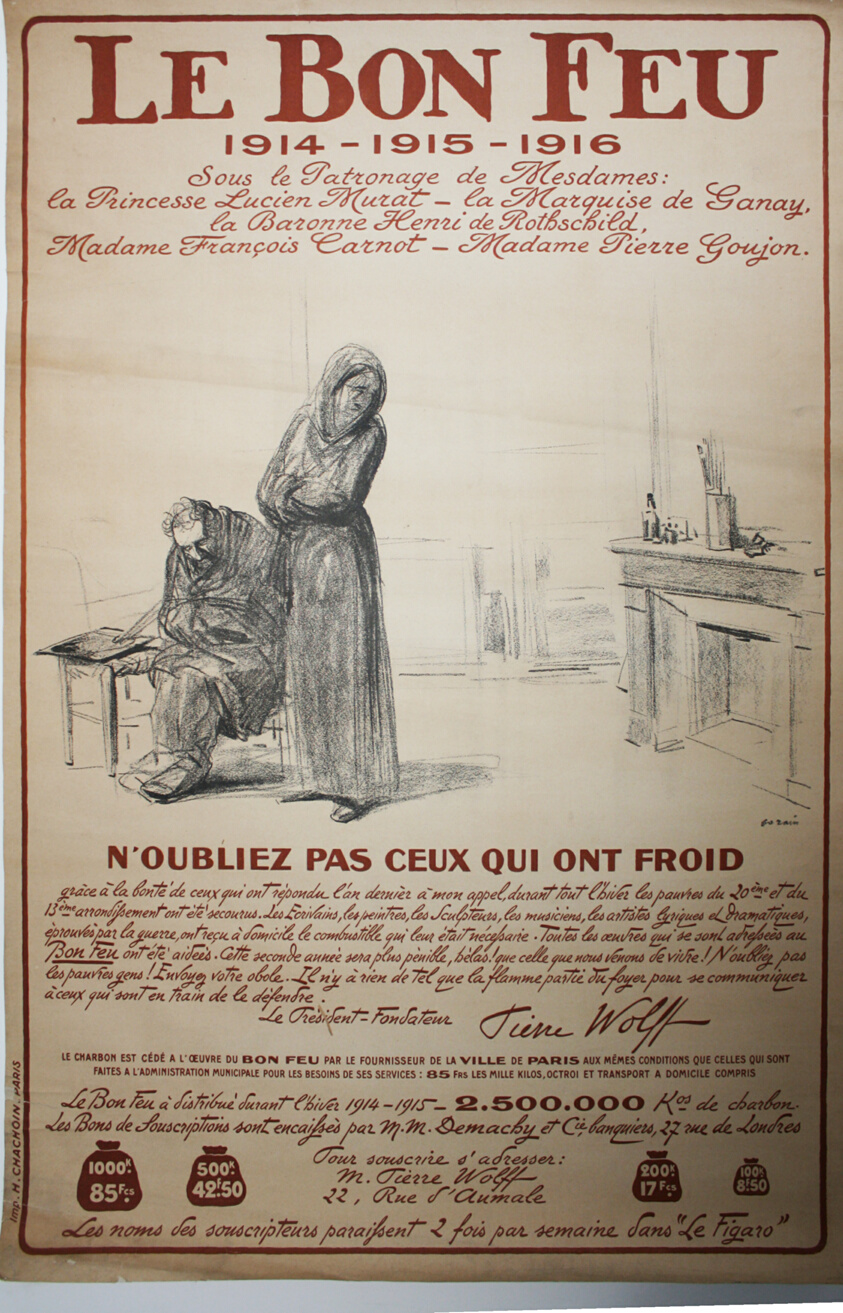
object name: Print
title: The Good Fire - Remember those who are cold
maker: Jean Louis Forain (French, 1852-1931); Printed by H. Chachoin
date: c. 1916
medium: Lithograph on cream wove paper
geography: France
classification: poster; print; prints and drawing